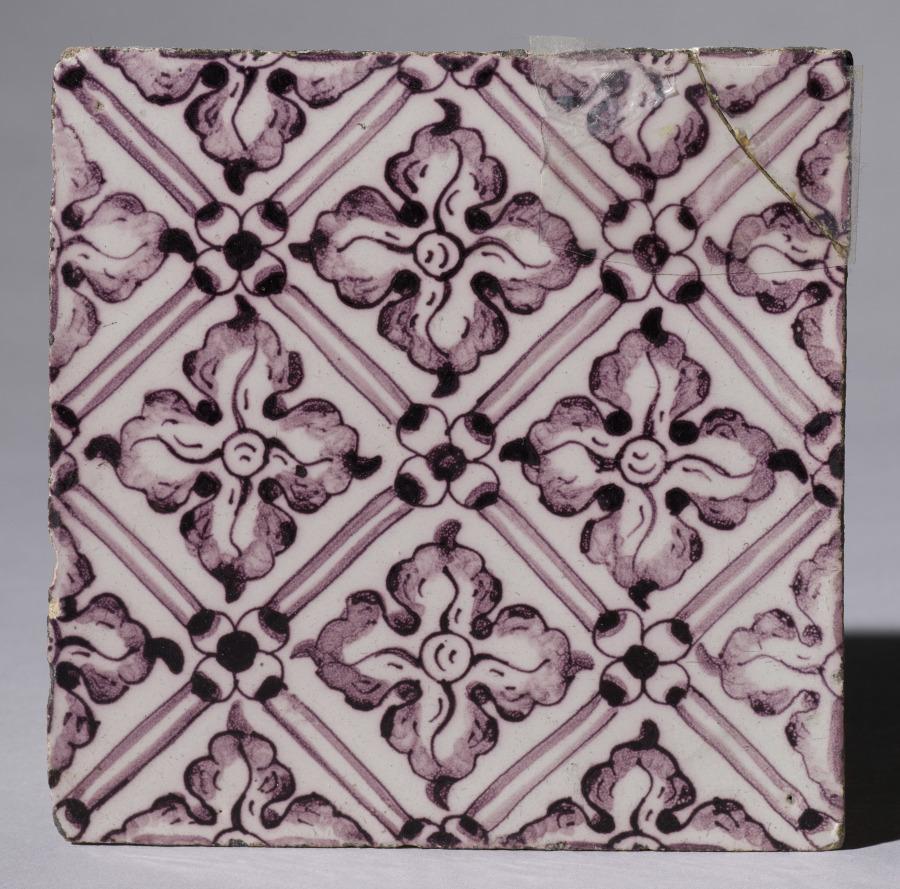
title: Tile- Floral Design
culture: Netherlands, Holland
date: 1700s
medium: glazed ceramic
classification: Ceramic